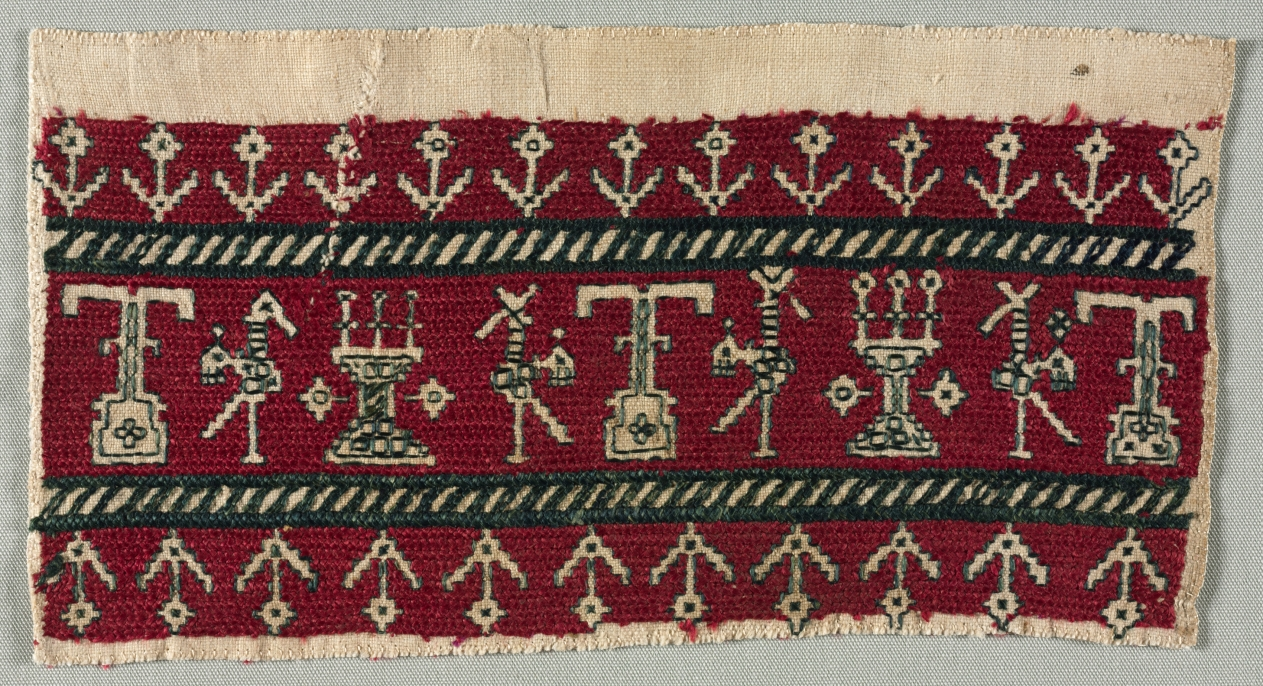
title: Fragment of a furnishing textile (one of five)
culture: Africa, North Africa, Morocco, Azemmour, Moroccan embroiderer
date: 1700s–1800s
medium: Linen, silk, dye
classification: Embroidery